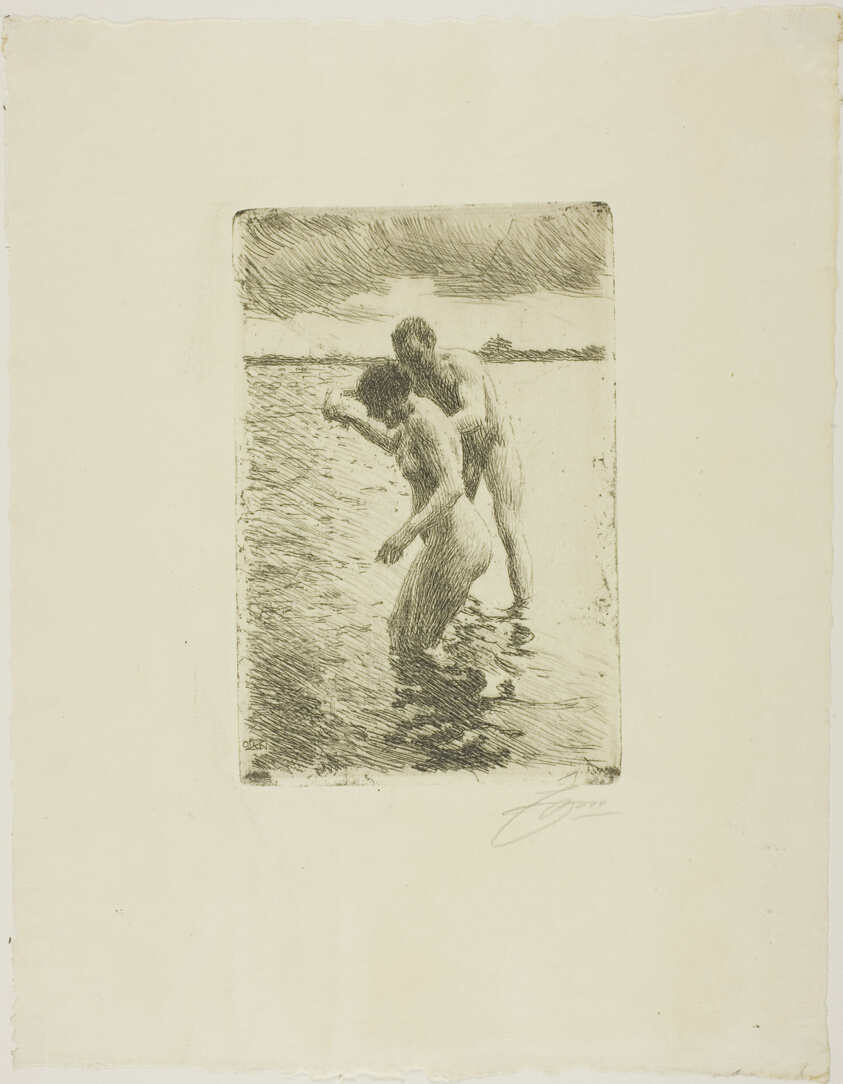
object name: Print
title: Pilot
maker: Anders Zorn (Swedish, 1860-1920)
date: 1919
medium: Etching on cream laid paper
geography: Sweden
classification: etching; print; prints and drawing